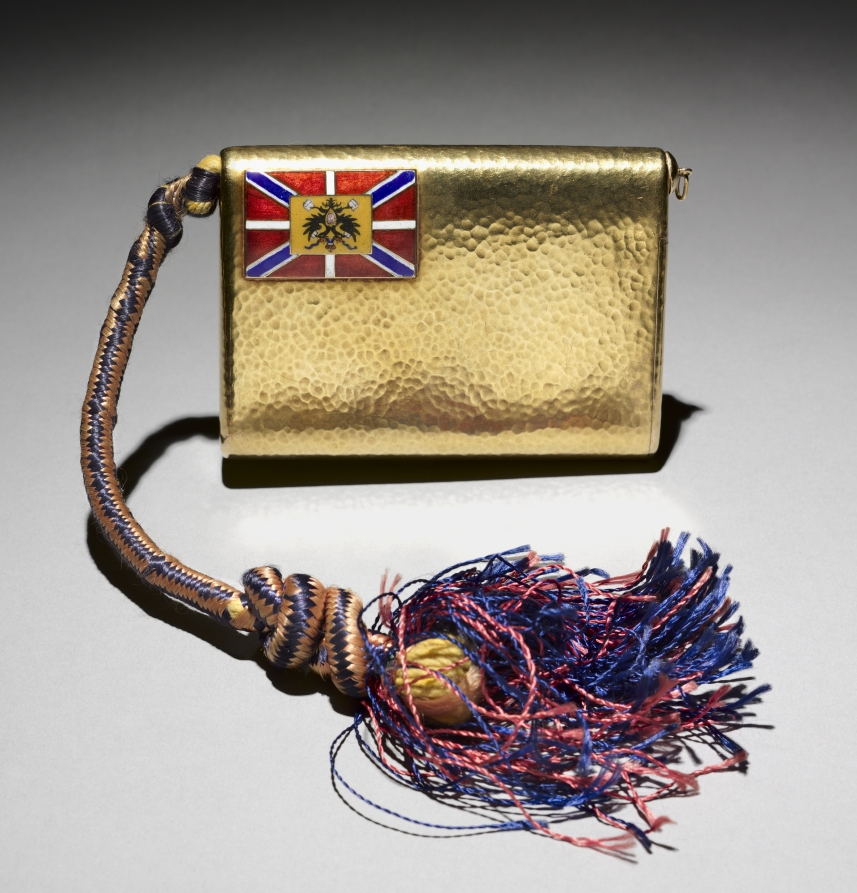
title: Cigarette Case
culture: Russia, St. Petersburg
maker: attributed to House of Fabergé (Russian, 1842–1918)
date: 1886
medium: gold, enamel, diamonds, silk cord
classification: Miscellaneous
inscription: inscribed: In Rembrance/from Sandro/Sevastopol/1886/6 May in Cyrillic script.